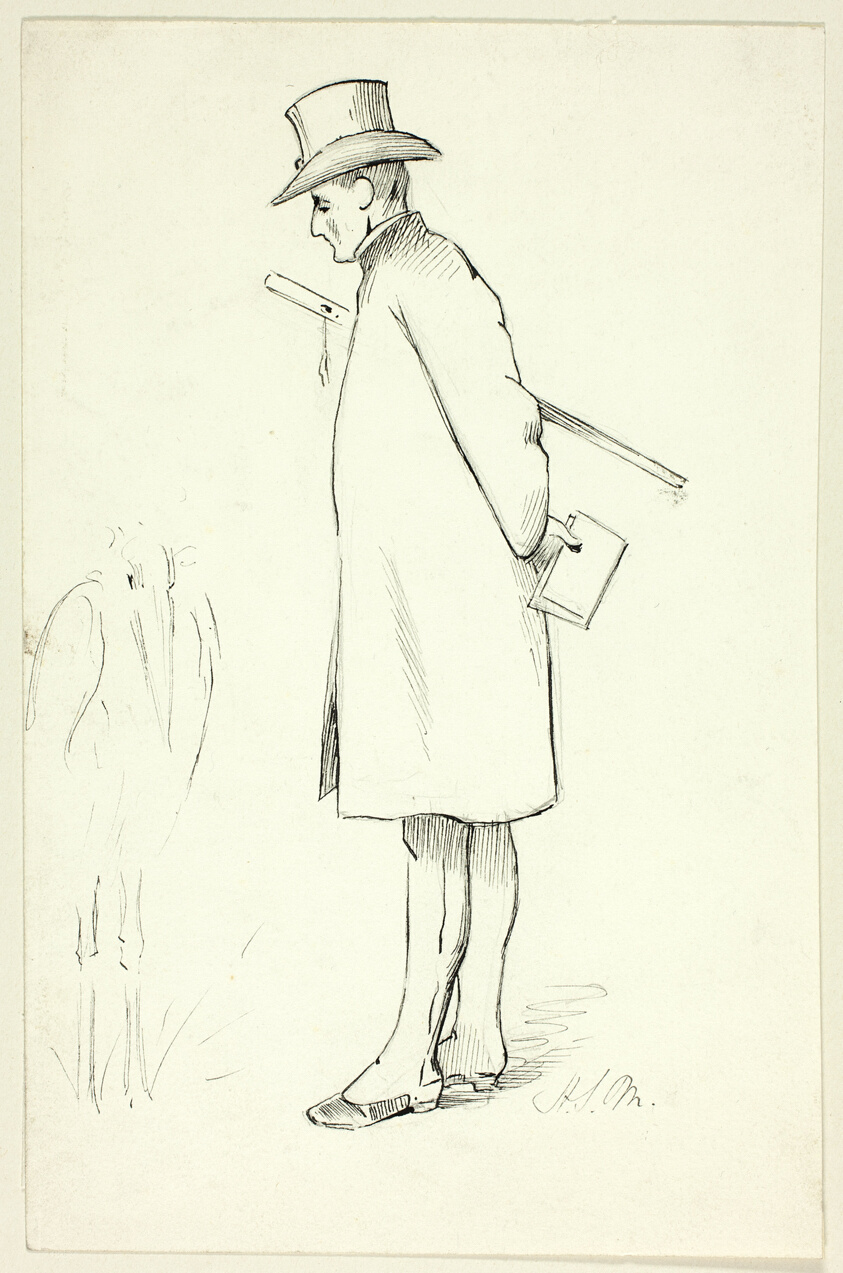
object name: Drawing and Watercolor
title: Study for Figure in Episcopal Visitation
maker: Henry Stacy Marks (English, 1829-1898)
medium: Pen and black ink over graphite on ivory wove paper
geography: England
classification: pen and ink drawings; drawings (visual works); prints and drawing